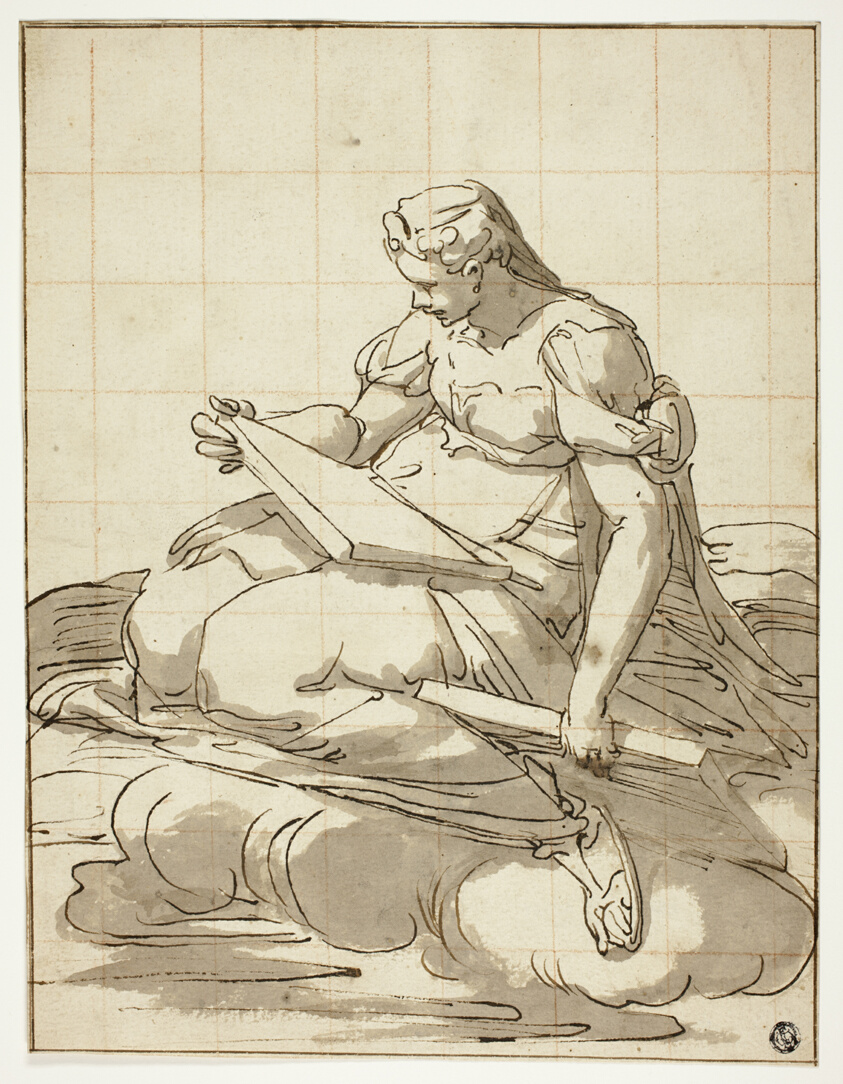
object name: Drawing and Watercolor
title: Sibyl in the Clouds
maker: After Luca Cambiaso; Italian, 1527-1585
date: after 1570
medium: Pen and brown ink with brush and brown wash, on ivory laid paper, squared in red chalk, tipped onto ivory laid paper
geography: Italy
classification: ink with wash; drawings (visual works); prints and drawing